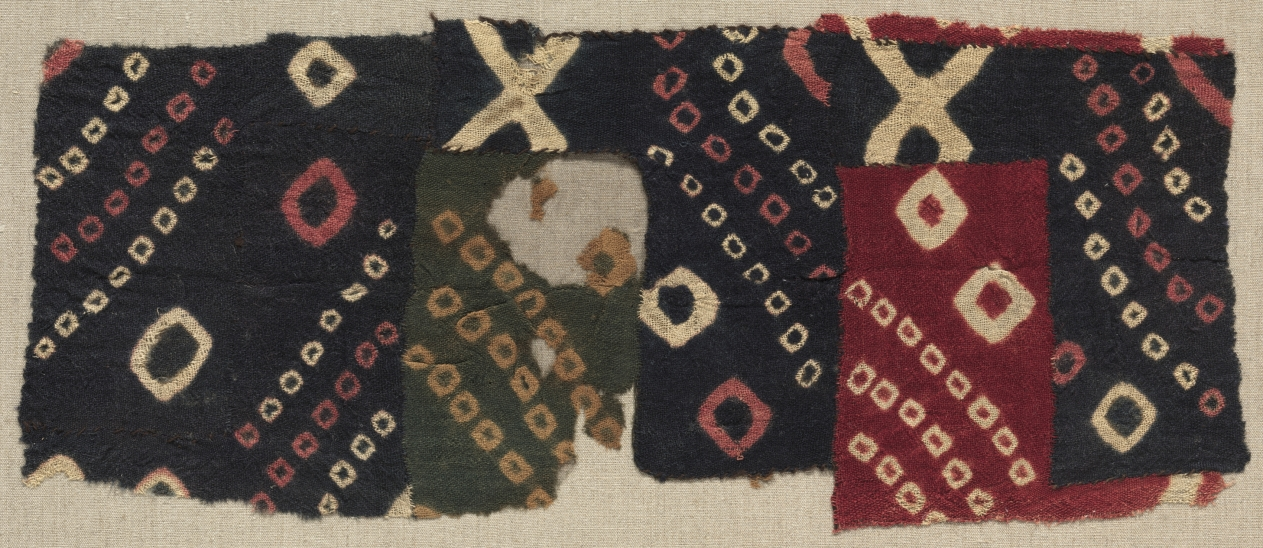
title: Tie-Dyed Fragment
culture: Peru, South Coast, Wari Culture, Middle Horizon, 8th-12th Century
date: c. 700–1100 A.D.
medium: discontinuous warp and weft, tie-dyed; wool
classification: Textile